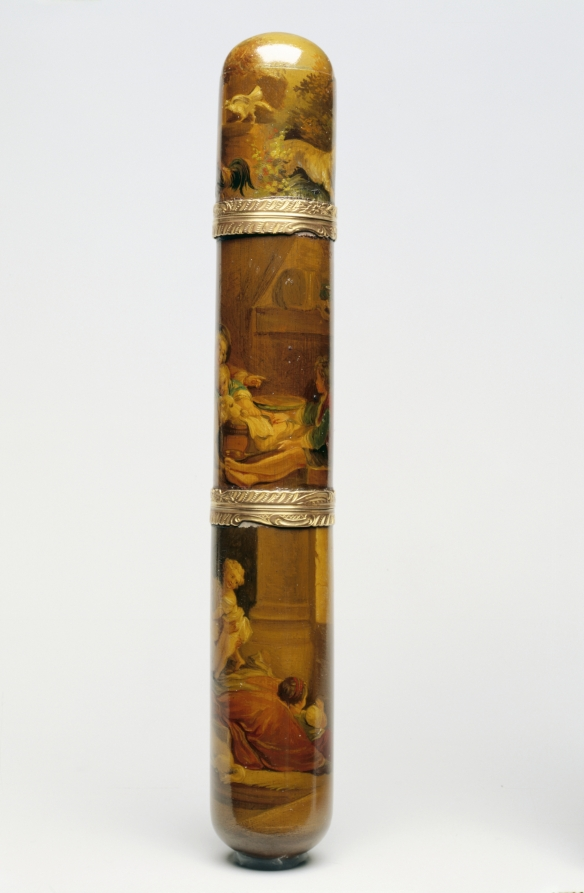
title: Perfume Case (Etui flaconnier)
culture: France, 18th century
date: c. 1780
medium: painted wood with gilt metal mounts, tortoiseshell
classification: Cosmetic Objects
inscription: Unmarked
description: Resting inside this case is a small octagonal crystal flask that would have held perfume. The painted miniatures are decorated with vernis martin, a popular varnish that imitated East Asian true lacquer. These scenes of rural merriment were often miniature reproductions of well-respected artists of the period. The depiction of three children and a dog on the lower portion of the case was drawn from Jean-Honoré Fragonard’s The Happy Family (L’heureuse fécondité) (1777).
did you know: Perfume was an important part of the French toilette, a lengthy ritual of washing and dressing practiced by members of the French social elite.